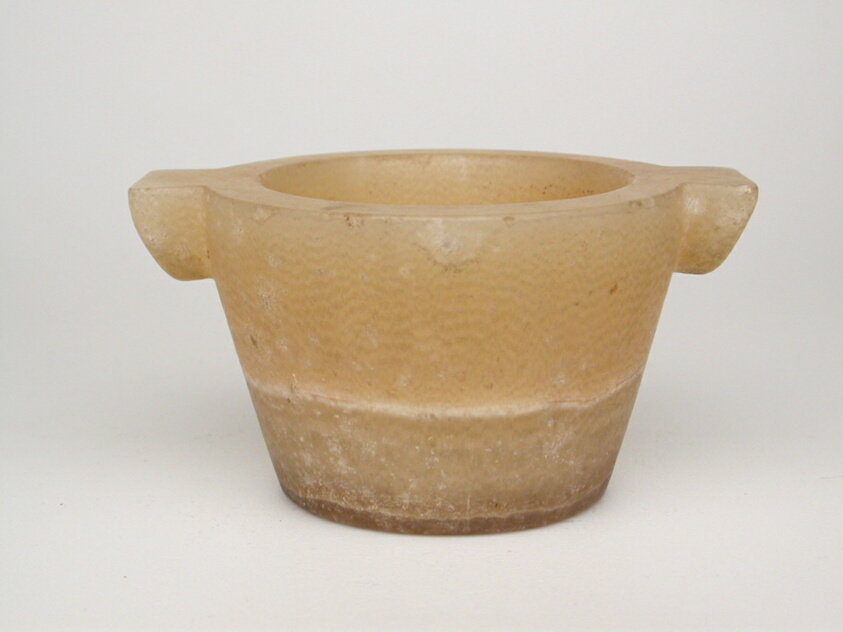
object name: Vessel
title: Mortar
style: late period (egyptian), saite period, twenty-sixth dynasty, egyptian, ancient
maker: Egyptian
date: Late Period, Dynasty 26 (664-525 BCE)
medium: Travertine (Egyptian alabaster)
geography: Egypt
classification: mortar (grinding tool); stone; vessel; ancient art